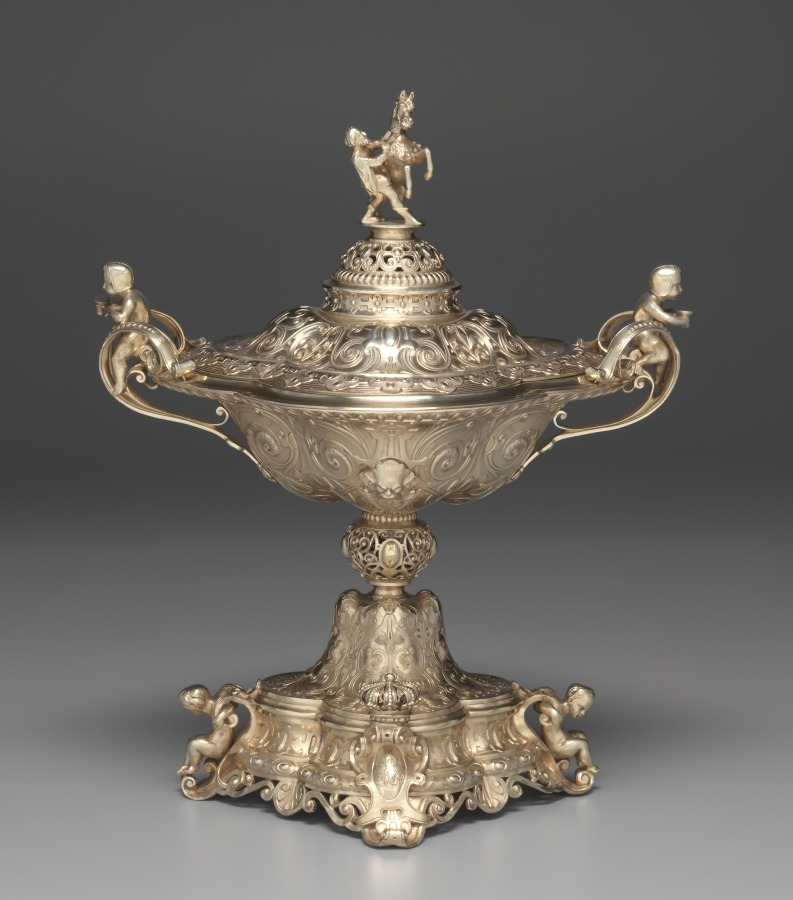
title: Centerpiece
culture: France, 19th century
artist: Charles-Nicolas Odiot (French, 1826–1868)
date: 1838–1848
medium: silver gilt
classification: Metalwork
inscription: engraved inside base: "ODIOT ORFEVRE DU ROI A PARIS"; engraved beneath crowns: "LP" (conjoined for King Louis Philippe of France).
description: Made for Louis Philippe (1773-1850), King of France 1830-48.